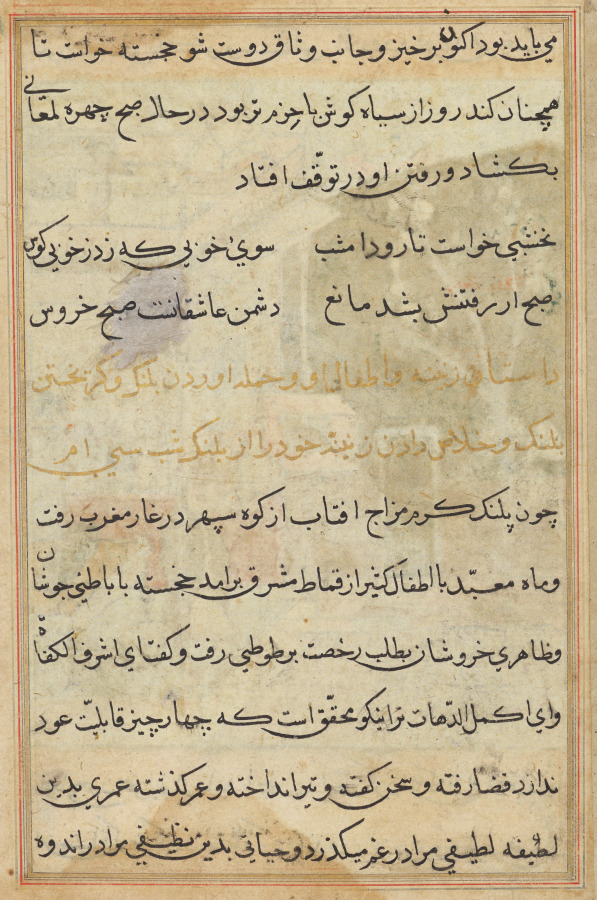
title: Tuti-Nama (Tales of a Parrot)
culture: Mughal India, court of Akbar (reigned 1556–1605)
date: c. 1560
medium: gum tempera, ink, and gold on paper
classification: Painting